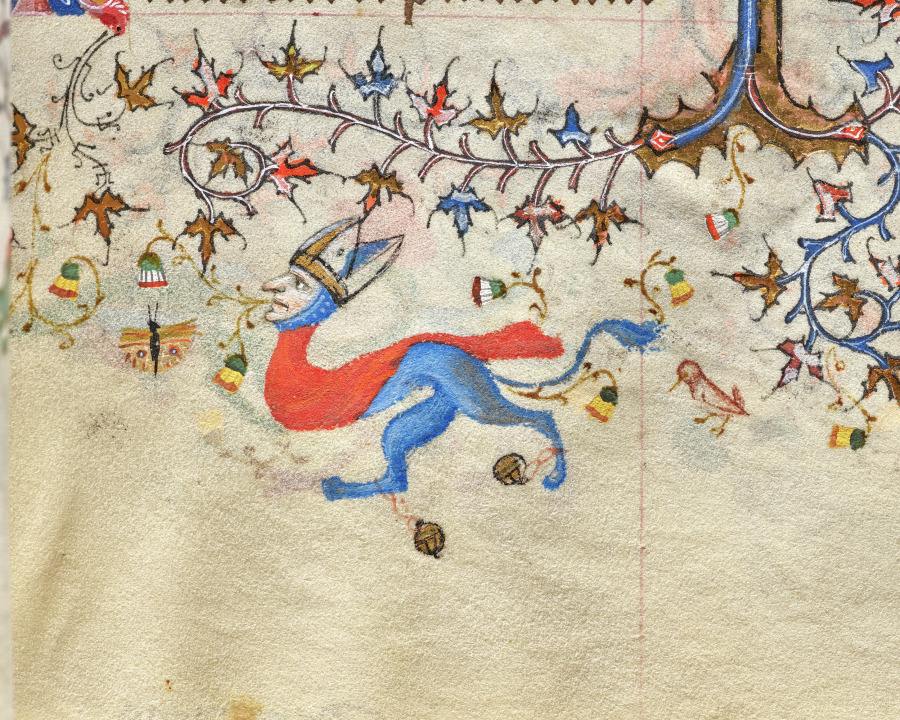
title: Hours of Charles the Noble, King of Navarre (1361-1425): fol. 218r, Text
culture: France, Paris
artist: Master of the Brussels Initials and Associates (French)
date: c. 1405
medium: ink, tempera, and gold on vellum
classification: Bound Volume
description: This precious volume was obviously highly prized by its owner, the French-born King of Navarre, who had his coat of arms painted on no less than twenty folios. Rather than directly commissioning this manuscript from a specific workshop, it seems that Charles the Noble acquired his book of hours -- perhaps ready-made for the luxury market -- while on a trip to Paris in 1404-05. A collaborative effort, six painting styles are evidenced within the pages of this codex, those of two Italians, two Frenchmen, and two Netherlanders. The painter who was responsible for the planning and decoration of the book, and who produced seventeen of the large miniatures, was a Bolognese artist known as the Master of the Brussels Initials. His principal assistant, responsible for most of the borders, was a Florentine who signed his name "Zecho" da Firenze on folio 208 verso.